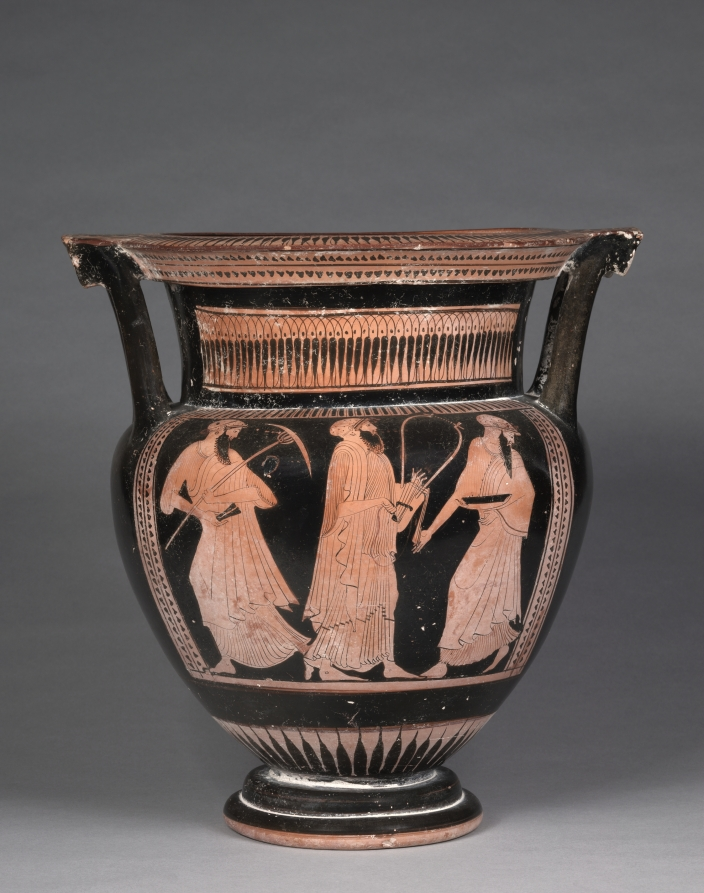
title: Red-Figure Column Krater (Mixing Vessel): Komos (Revel)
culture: Greek, Attic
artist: attributed to Pig Painter (Greek, Attic, active c. 480–460 BCE)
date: c. 470–460 BCE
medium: ceramic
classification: Ceramic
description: Used for mixing wine and water at a symposium (drinking party), this vase bears images of komasts, or revelers, potentially mirroring the actions of its users. The three bearded men on side A stand out for their earrings, long drapery, and Eastern-style headdresses, and for the parasol held by one. Similar features have been noticed on numerous other red-figure vases, now called “Anakreontic” by scholars. This name refers to Anakreon, a 6th-century BC lyric poet from East Greece sometimes credited with inventing the barbitos, the long-stringed lyre played by the central figure on side A. The youths on side B, one draped, two nude and dancing, are less unusual.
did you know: These three bearded men wear earrings and Eastern-style headdresses—unusual features in fifth-century BC Athens.